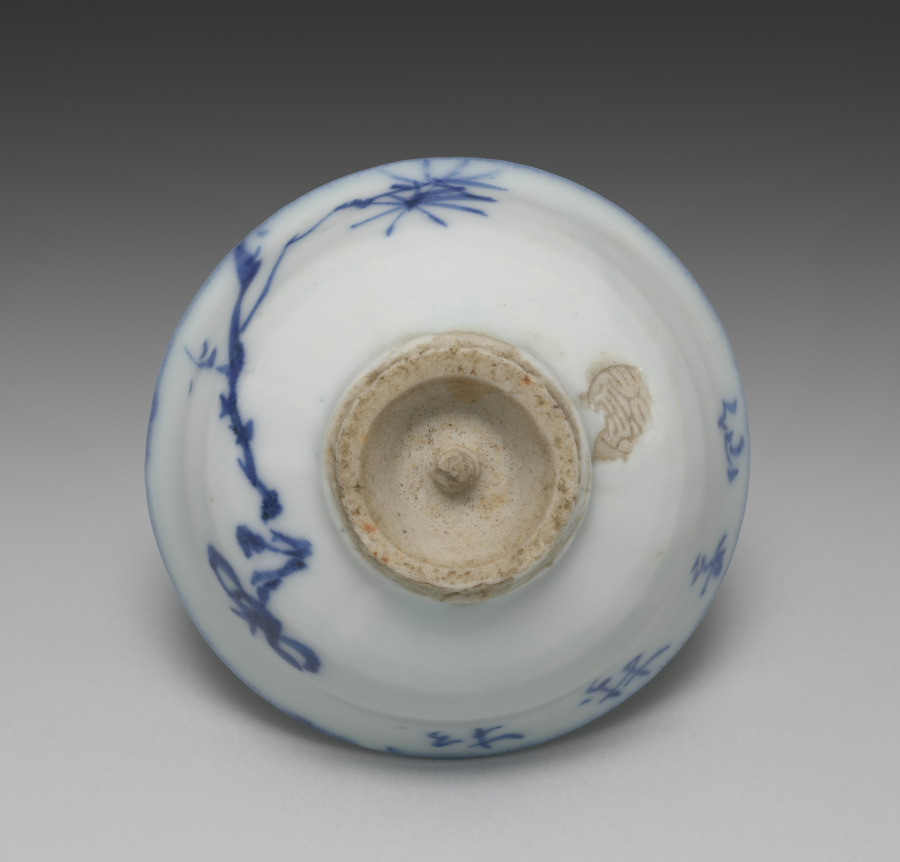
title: Sake Cup with Auspicious Plants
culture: Japan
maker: Seifū Yohei II (Japanese, 1844–1878)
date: 1861–78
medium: One of a pair of sake cups; porcelain with underglaze blue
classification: Ceramic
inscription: 松梅芝仙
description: Seifū Yohei II excelled as a painter, as evidenced by his floral and landscape designs. His works were selected as the best among Kyoto ceramics shown to jurists from Europe and the US, thus paving the way for international recognition of the studio in the late 1800s.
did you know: The plum and the pine are two of the "Three Friends of Winter," auspicious symbols of a cultured scholar's virtues: steadfastness, resilience, and flexibility.